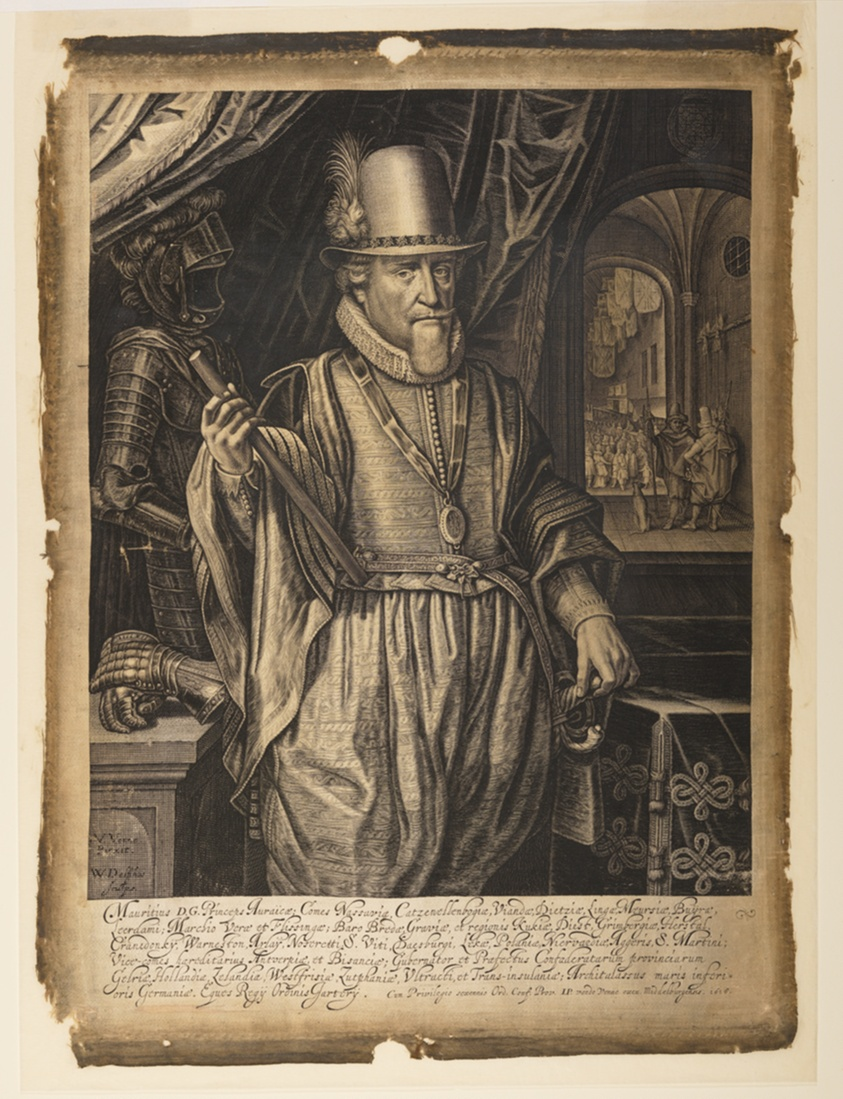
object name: Print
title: Maurits, Prince of Orange-Nassau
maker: Willem Jacobsz Delff (Dutch, 1580–1638); after Adriaen van de Venne (Dutch, 1589–1662)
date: 1618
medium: Engraving on silk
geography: Netherlands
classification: engraving; print; prints and drawing; silk